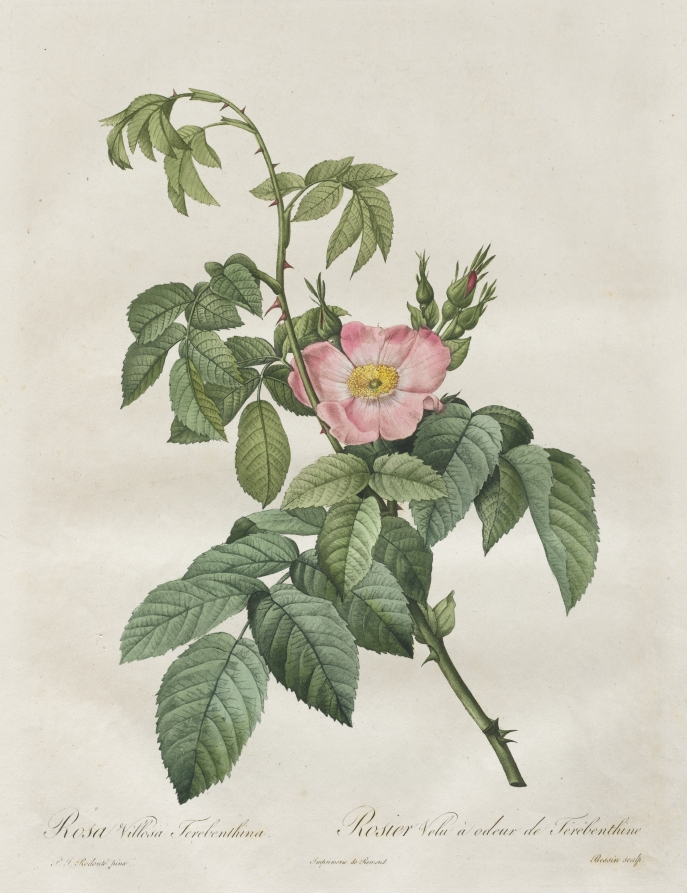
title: Les Roses: Rosa Villosa Terebenthina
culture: France, 19th century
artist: Henri Joseph Redouté (French, 1766–1853)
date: 1817–1824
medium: stipple and line engraving, with hand coloring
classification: Print